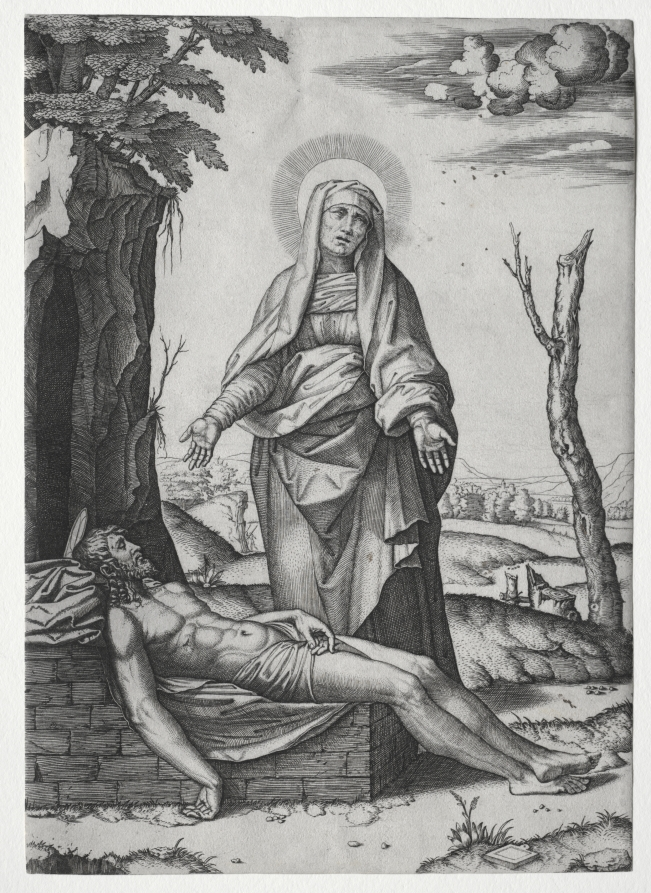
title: The Pietà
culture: Italy, 16th century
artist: Marcantonio Raimondi (Italian, 1470/82–1527/34)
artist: after Raphael (Italian, 1483–1520)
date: c. 1515–17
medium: engraving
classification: Print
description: The pietà—a scene of the Virgin Mary holding the dead body of Christ—was a traditional subject for sculpture in Northern Europe. Michelangelo’s sculpted Pietà of 1498 brought the composition to Italy and infused it with the idealism of classical sculpture. His contemporary, Raphael, designed this version of the scene two decades later, which was then engraved by Marcantonio Raimondi. It builds upon Michelangelo’s sculpted version but focuses on Mary’s statuesque pose and her intense expression of grief. The dead Christ—still idealized and classical in form—is laid before her rather than held in her lap.